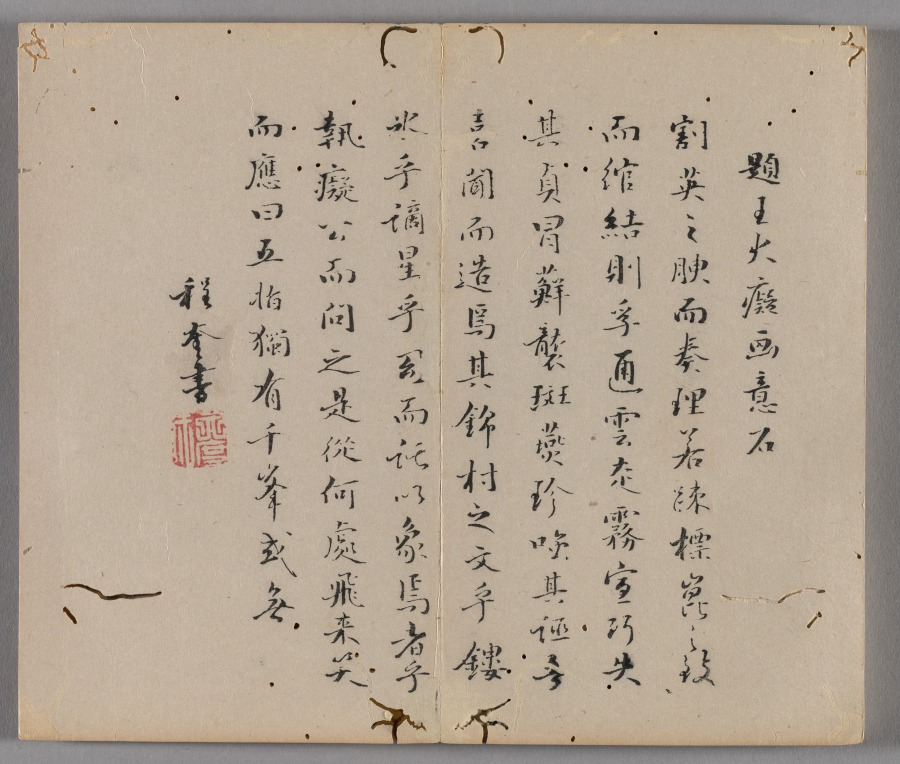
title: Ten Bamboo Studio Painting and Calligraphy Handbook (Shizhuzhai shuhua pu): Rocks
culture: China, Qing dynasty (1644-1911)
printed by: Hu Zhengyan (Chinese, c. 1584–1674)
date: 1633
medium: Woodblock-printed book; ink and colors on paper; first edition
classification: Print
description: Color printing reached a level of perfection in the early 1600s, as seen in this Ten Bamboo Studio Collection of Calligraphy and Painting and the Mustard Seed Garden Manual of Painting (printed 1679 and 1701). The painterly quality, precision in registering (aligning) the woodblocks, and harmonious colors made them the most successful color print editions in Chinese history. Both editions were printed and compiled in Nanjing, spread nationwide, and had a great impact on the arts in Japan and Korea.